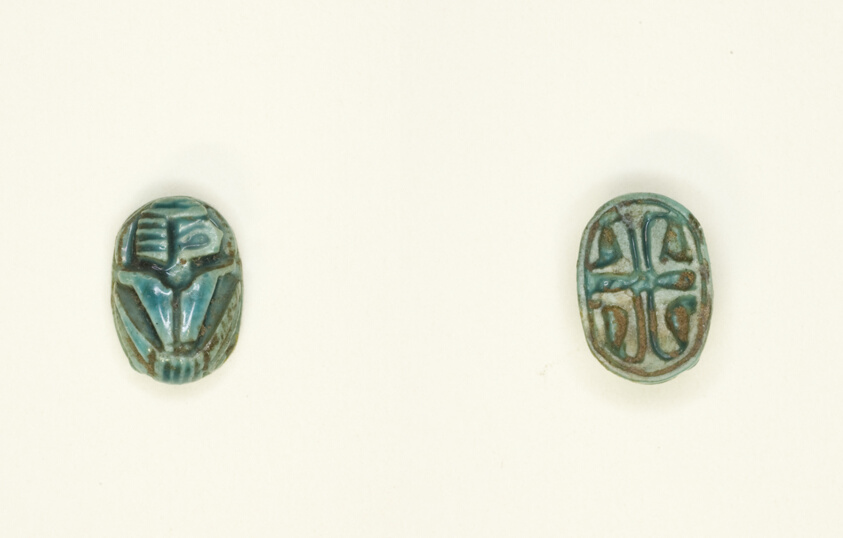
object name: Costume and Accessories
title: Scaraboid: Crouched Human Figure Shown in Profile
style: new kingdom, ancient, egyptian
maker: Egyptian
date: New Kingdom, Dynasties 18–20 (about 1550–1069 BCE)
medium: Glazed steatite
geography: Egypt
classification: scaraboids; amulet; ancient art; costume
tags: men, floral motifs